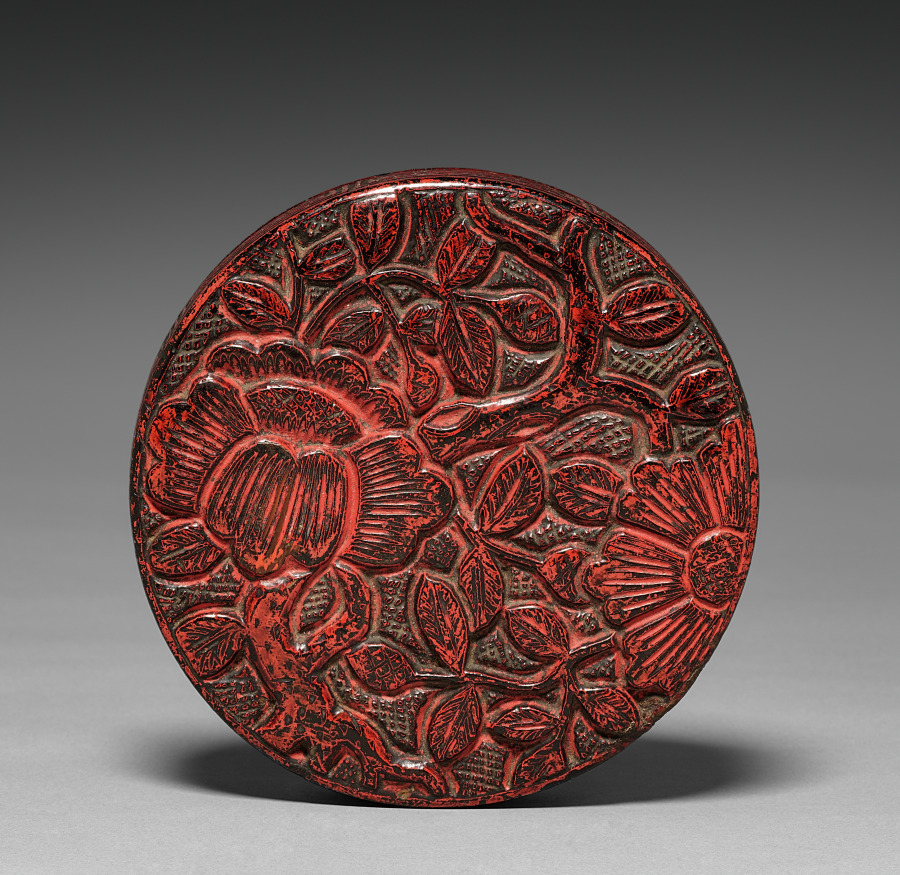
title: Incense Box (Kogo) with Camellia Design (lid)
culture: Japan, Muromachi period (1392–1573)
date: 1500s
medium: carved wood with black and red lacquer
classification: Lacquer